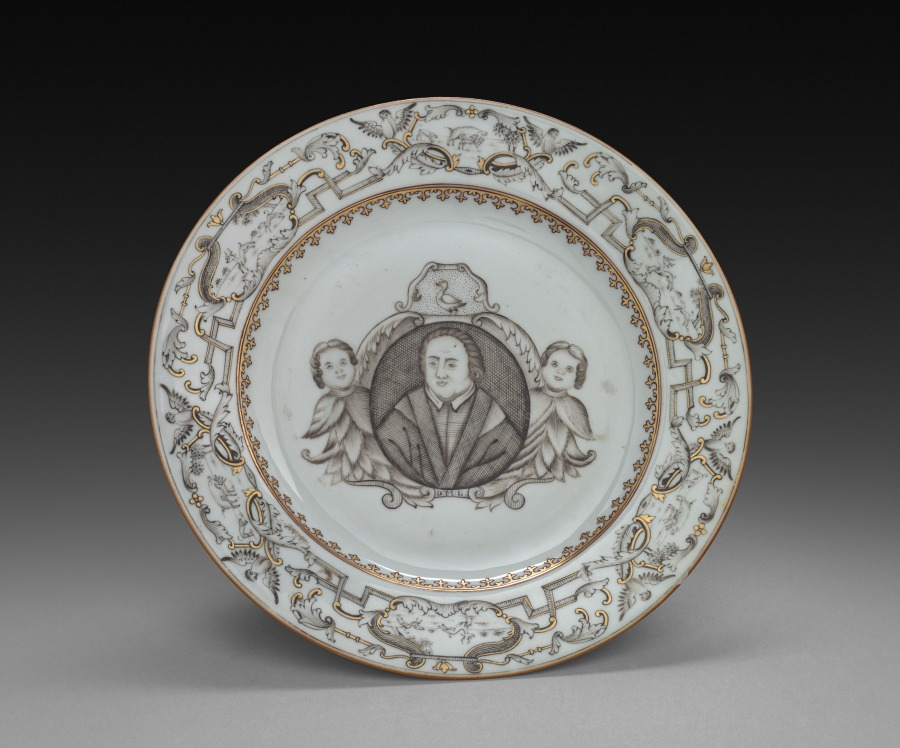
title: Plate: Martin Luther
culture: China, Chinese Export, 18th century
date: 1756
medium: porcelain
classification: Ceramic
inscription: monogram on back and 1756 in gold.